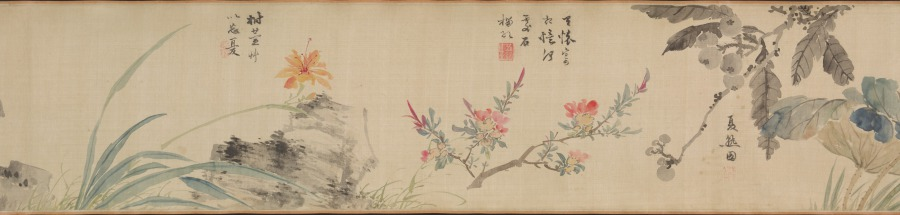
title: Flowers of Four Seasons, with Poems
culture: China, Ming dynasty (1368–1644)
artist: Wang Guxiang (Chinese, 1501–1568)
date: 1531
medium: handscroll; ink and light color on silk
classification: Painting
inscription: Artist's inscription, signature, and 15 seals. Ink Orchids. Sewn as pendants for the man of worth, swaying quiety, fragrance in the valley. [seal] Hsiao-chu ts'un Peony. Wiping his face, the young gentleman Ho [Ho Yen of Wei, Three Kingdoms] appears to have been powdered. His previous life was the perfume-stealing Han Shou [of Chin, 265–419 CE], the fragrance still lingers. [seal] Ts'un-wu chai. Flowering Crab Apple, New Bamboo. Shao-lin [Du Fu, 712–770] had to put down his brush. [Flowering Crab Apple]. Yü-k'o [Wen T'ung, d. 1079) in vain wrote poems about [Bamboo]. [seal] Yu-shih. Lotus Flowers. When she turns her head, half-hidden by a fan, and casts a glance, all the beautiful women become colorless. [seal] K'ang yüeh huai. Loquat. Ripeness in summer. [seal] Lu-chih. Pomegranate Flower. Whenever I remember you I will send my thoughts, but where have you gone--the [skirt] of pomegranate red? [seal] Wu-ho Sheng. Day Lily. Plant the day lily to forget sorrow. [seal] Yu-shih. Chrysanthemum. The untrammelled joy at the eastern fence. [seal] Lu-chih. Begonia. Comparing it to the beauties of Spring, and spreading them out as trimming for the stone steps. [seal] Yu-shih. Hibiscus. In recent years I have always enjoyed looking at flowers; instead of dark red I preferred pink ones. [seal] Jen-sheng i-lou. Narcissus, Camellia. The jade girdle left behind at Lo River. [Narcissus]. The precious pearls glitter before Spring. [Camellia]. [seal] Lu-chih. Heavenly Bamboo (Nandina domestica). A single branch in the wintry season. [seal] K'ang yüeh huai. Plum. Fragrant snow in the Lo-fou Mountains. [seal] Ts'un-wu chai. In the eleventh lunar month of the hsin-mao year of the Jiaqing era [1531], [I] imitated the boneless style of Yüan masters in sketching from life. Guxiang [seals] Yu-shih; Lu-chih. Translated by Wai-kam Ho/Lingyun Shih Liu (1980)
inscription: 2 colophons and 23 additional seals: 1 colophon dated 1632, and 2 seals of Li Jih-hua [Li Rihua] 李日華 (1565–1635); 1 colophon and 2 seals of Xiang Shengmo 項聖謨 (1597–1658); 3 seals of Liang Qingbiao 梁清標 (1620–1691); 6 seals of the Jiaqing 嘉慶 emperor (r. 1796–1820); 9 seals of Ch'eng Ch'i [Cheng Qi] 程琦 (1911–1988)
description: In this painting, flowers are loosely arranged by the seasons: narcissus and peony represent early spring; yellow loquat and lotus, summer; chrysanthemum, autumn; and the plum and evergreen bamboo, winter. The artist added to each flower a poetic line of calligraphy associating each plant with a historic or legendary figure. For example, the chrysanthemum, along with the line “The untrammeled joy at the eastern fence,” refers to the poet Tao Yuanming (died AD 427) who enjoyed chrysanthemums at the eastern fence in his garden. The scroll illustrates Wang Guxiang’s mastery of free brushwork, combining light monochrome ink with transparent colors. In his inscription, Wang says he used the “boneless” style without outlines as developed during the Yuan dynasty (1279–1368). Wang was a native of Changzhou, a city in southeast China known for its rich flora and fauna, and flower-and-bird painting tradition.